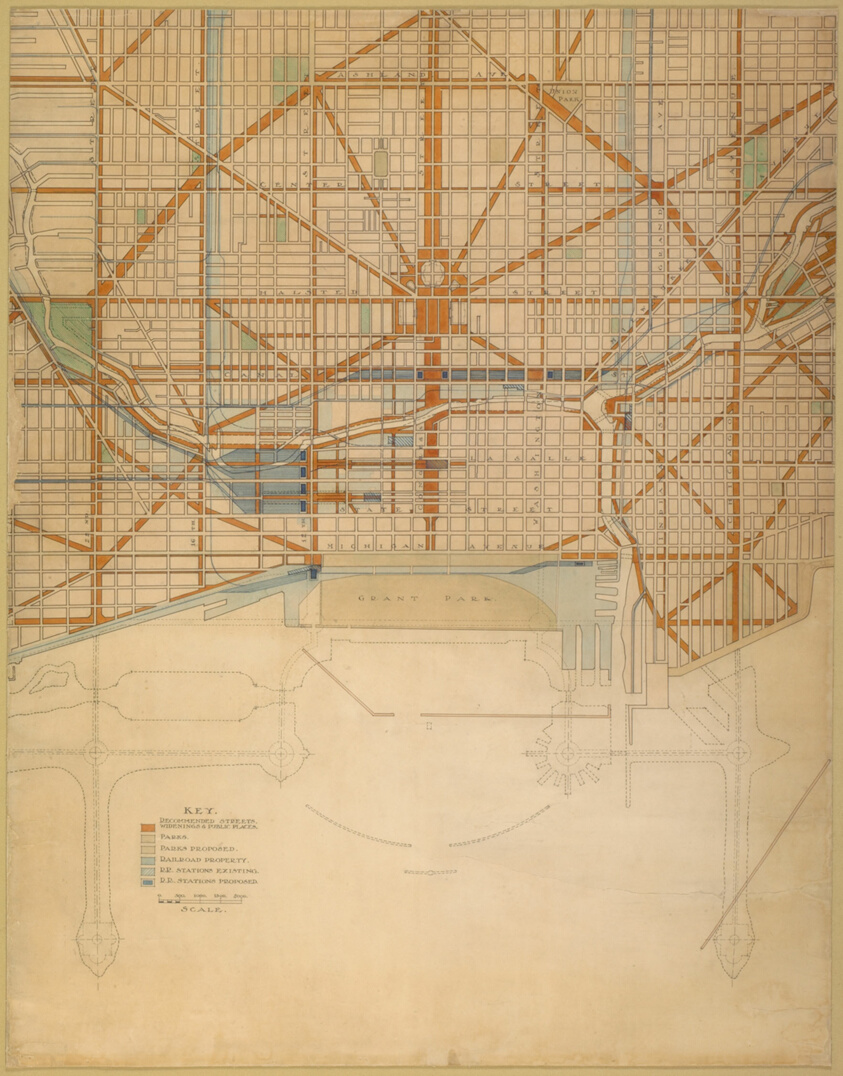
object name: Architectural Drawing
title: Plan of the Center of the City, the 1909 Plan of Chicago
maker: Daniel Hudson Burnham, American, 1846-1912; Edward Herbert Bennett, American, born England, 1874-1954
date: 1909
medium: Ink and watercolor on paper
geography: Chicago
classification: ink; architectural drawing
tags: Chicago, architecture